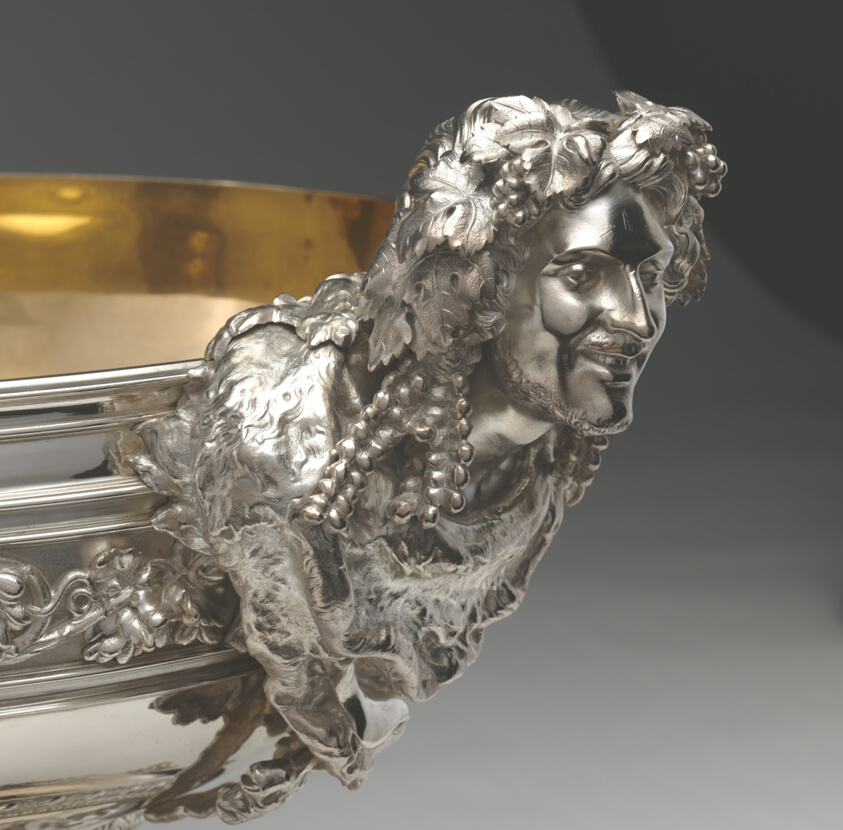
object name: Metalwork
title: Punch Bowl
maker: Chased by Eugene J. Soligny (American, c. 1833–1901); Tiffany and Company (American, founded 1837); New York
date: 1873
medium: Silver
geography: New York City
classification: punch bowl; silver; american decorative arts; american arts; decorative arts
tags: dining, drinking